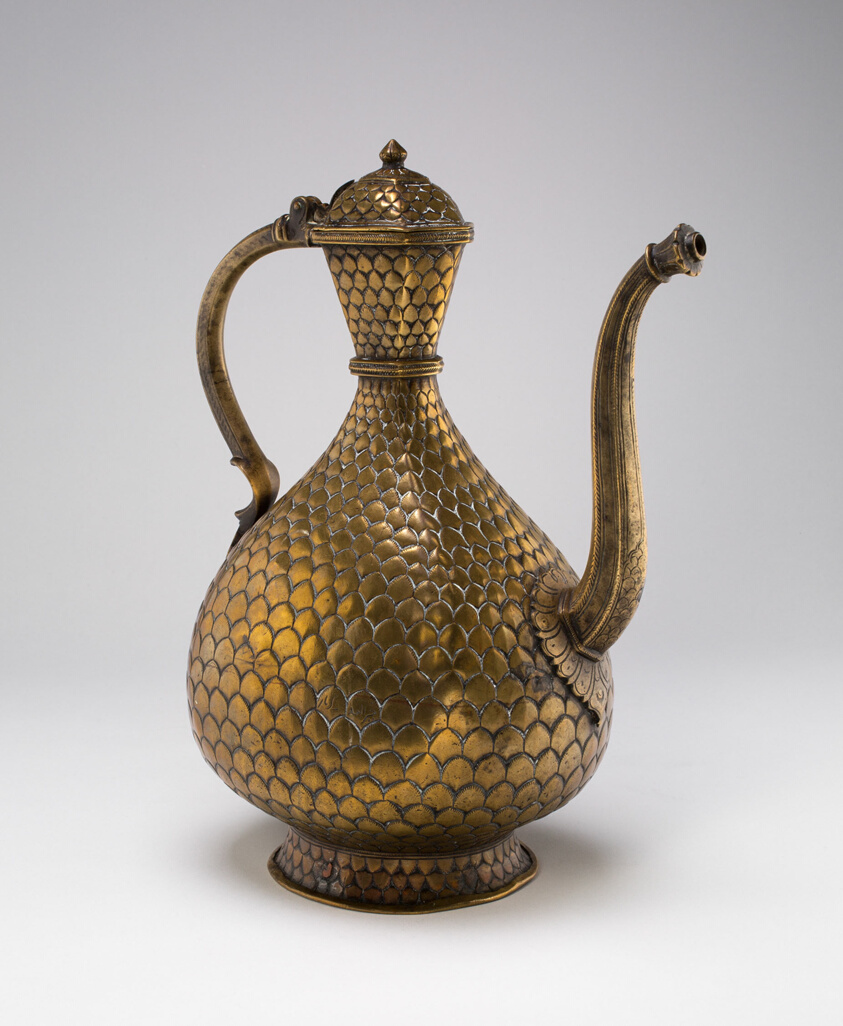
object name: Decorative Arts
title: Ewer with Engraved Fish Scale Pattern, Inscribed in Persian with the name "Khairullah"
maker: India; Deccan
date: Early 18th century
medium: Brass repoussé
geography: India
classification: ewer (vessel); vessel; decorative arts